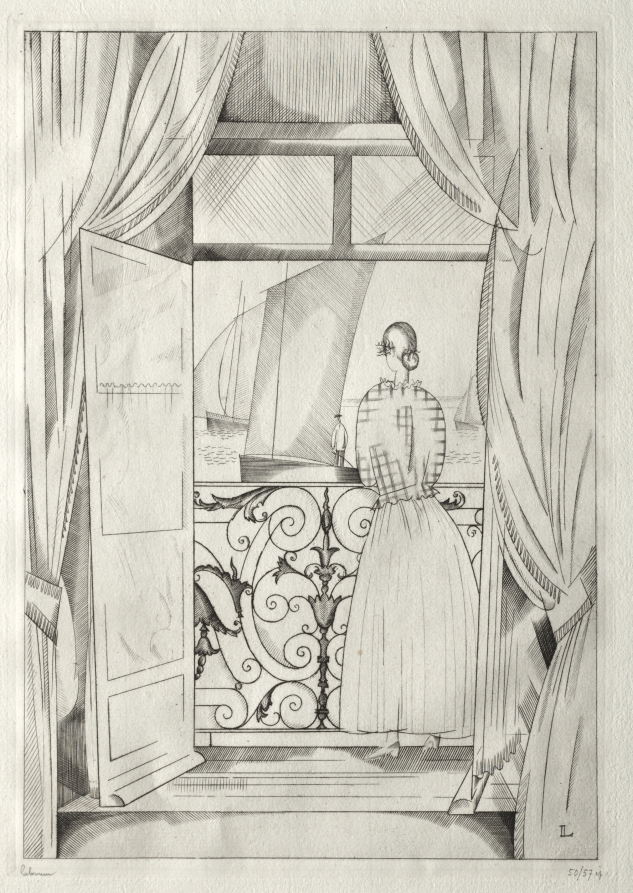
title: The Balcony over the Sea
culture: France, 20th century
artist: Jean-Émile Laboureur (French, 1877–1943)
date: 1923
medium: engraving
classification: Print